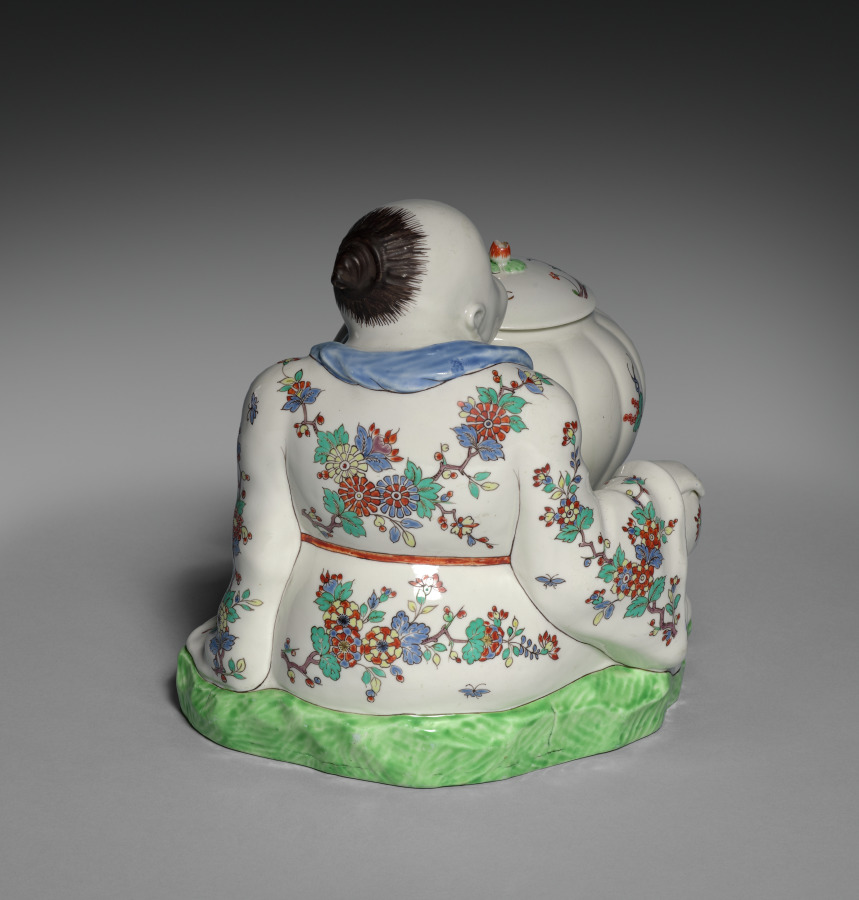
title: Figure of Budai or Hotei with Jar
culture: France, Chantilly, 18th century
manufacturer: Chantilly Porcelain Factory (French)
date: c. 1735–40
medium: Tin-glazed soft-paste porcelain with enamel decoration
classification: Ceramic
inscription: [Mark of the Chantilly factory (red hunting horn), on bottom]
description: The production of decorative figures like this one, referred to as magots or pagodes in European texts, was the result of an 18th-century European interest in Chinese and Japanese culture and porcelain. Budai, pronounced Hotei in Japanese, was a semilegendary Chinese monk known in Japan through the transmission of Chan Bhuddism. This figure’s decoration with multicolor overglaze enamels on a milky-white is typical of Japanese Kakiemon style.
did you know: In 1735, the Chantilly factory was given a 25-year royal privilege for the manufacture of objects that imitated Japanese porcelain.